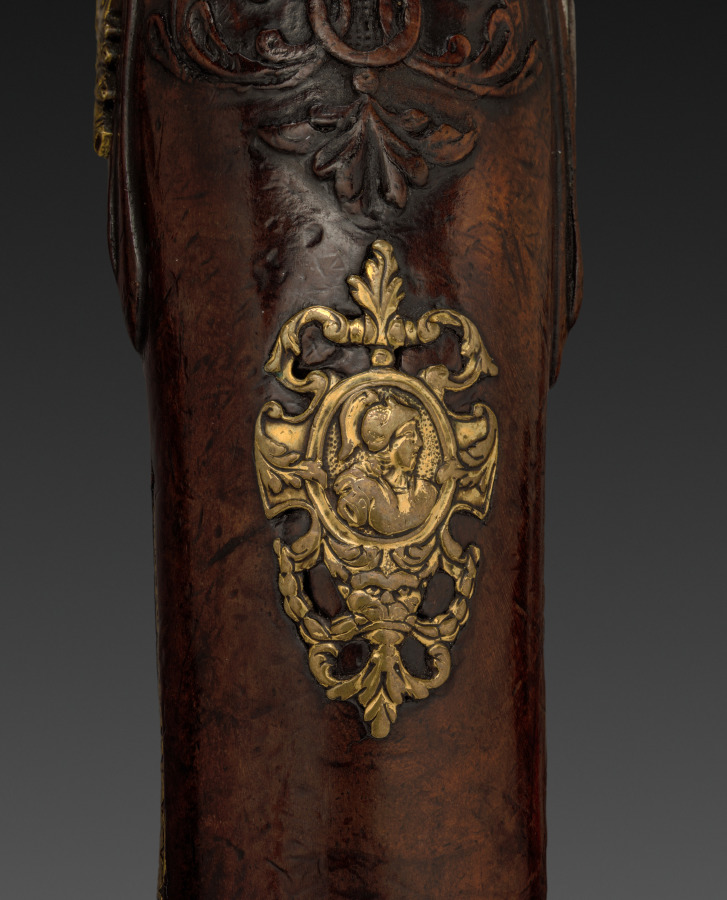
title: Flintlock Pistol (1 of 2)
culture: Franco-Flemish, Liège, early 18th century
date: early 1700s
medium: steel with gold inlay, gilt-brass mounts; walnut burl stock; chiseled high-relief decoration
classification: Arms and Armor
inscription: on barrel: G. MASSIN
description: The exquisite ornament along the breech of the barrel is chiseled and engraved. The barrel of this pistol is signed g. massin, the name of a gunsmith working in eastern France or French-speaking Flanders, possibly the city of Liège.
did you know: The flintlock ignition system was developed in the 1600s and remained the dominant system until the early 1800s.